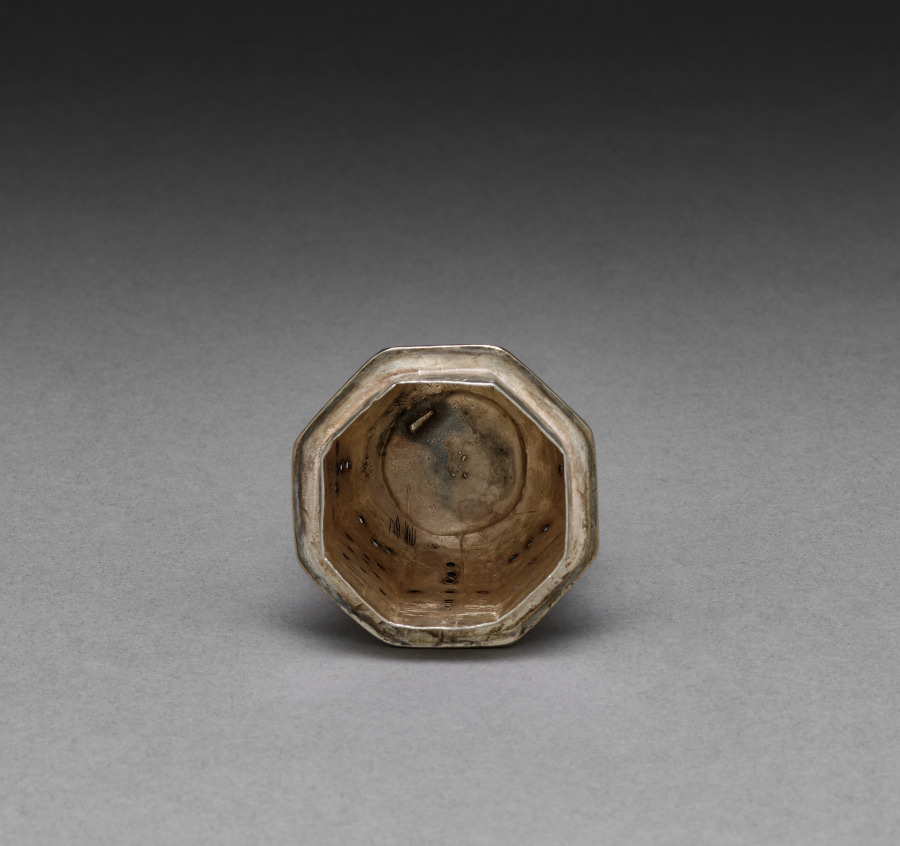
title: Caster (lid)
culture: England, London, 18th century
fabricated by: William Spackman (British)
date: 1719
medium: silver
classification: Silver